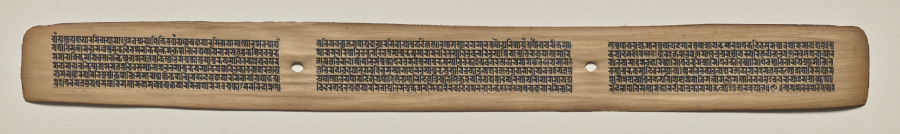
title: Text, Folio 121 (recto), from a Manuscript of the Perfection of Wisdom in Eight Thousand Lines (Ashtasahasrika Prajnaparamita-sutra)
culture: Eastern India, Bihar, Vikramashila Monastery. Painting: Nepal, Kathmandu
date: Sunday, September 14, 1119 (year 239 of the Newar Samvat in the month of Ashvina)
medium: gum tempera and ink on palm leaves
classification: Painting